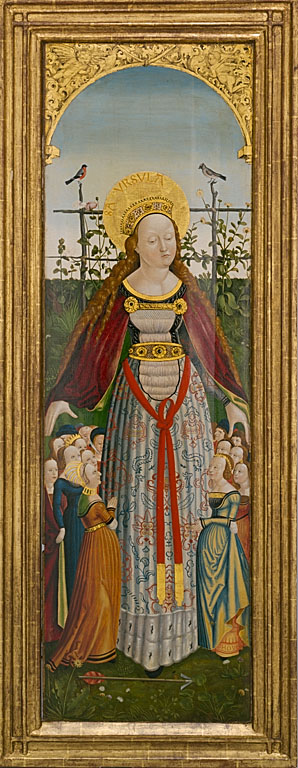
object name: Painting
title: Triptych of the Virgin and Child with Saints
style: 16th Century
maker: South German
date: c. 1510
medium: Oil and tempera on panel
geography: Germany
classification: triptych; painting; oil on panel; paint; tempera; european painting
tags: Century of Progress, woman with children, woman, women, Saint Margaret, Christian subjects, Christianity, garden, saints, Virgin and child/Madonna and child, Virgin Mary, world's fairs, Chicago World's Fairs